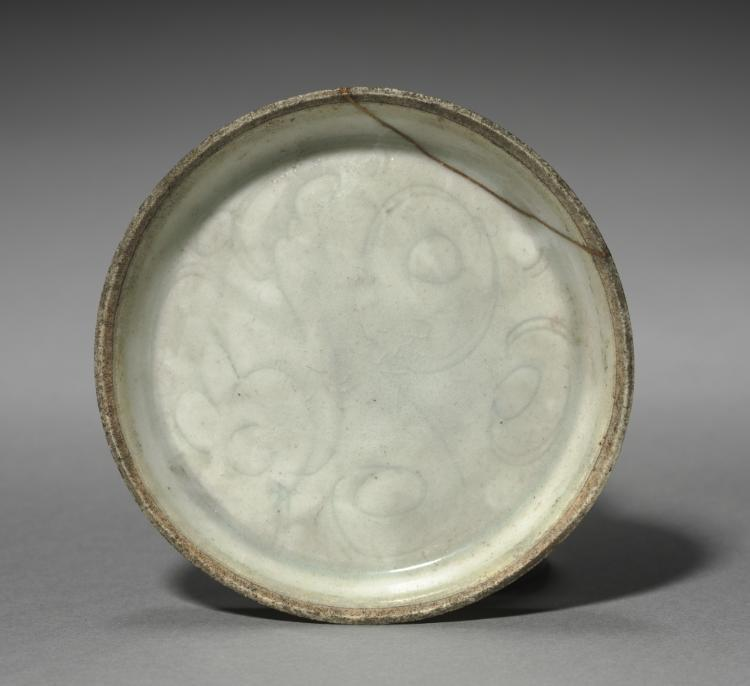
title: Dish with Incised Scroll Design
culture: China, Song dynasty (960-1279)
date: 900s–1100s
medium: Pottery with pale bluish-white glaze and incised design, Qingbai ("blue-white") ware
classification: Ceramic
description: While this dish was donated as a rare white celadon excavated from a Goryeo period tomb, it turns out to be a Song period Chinese Qingbai ware much enjoyed as a luxury item among Korean ruling elites in the Goryeo period (918–1392).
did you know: This lightly potted shallow dish is carved and combed with what might be flowering peony.